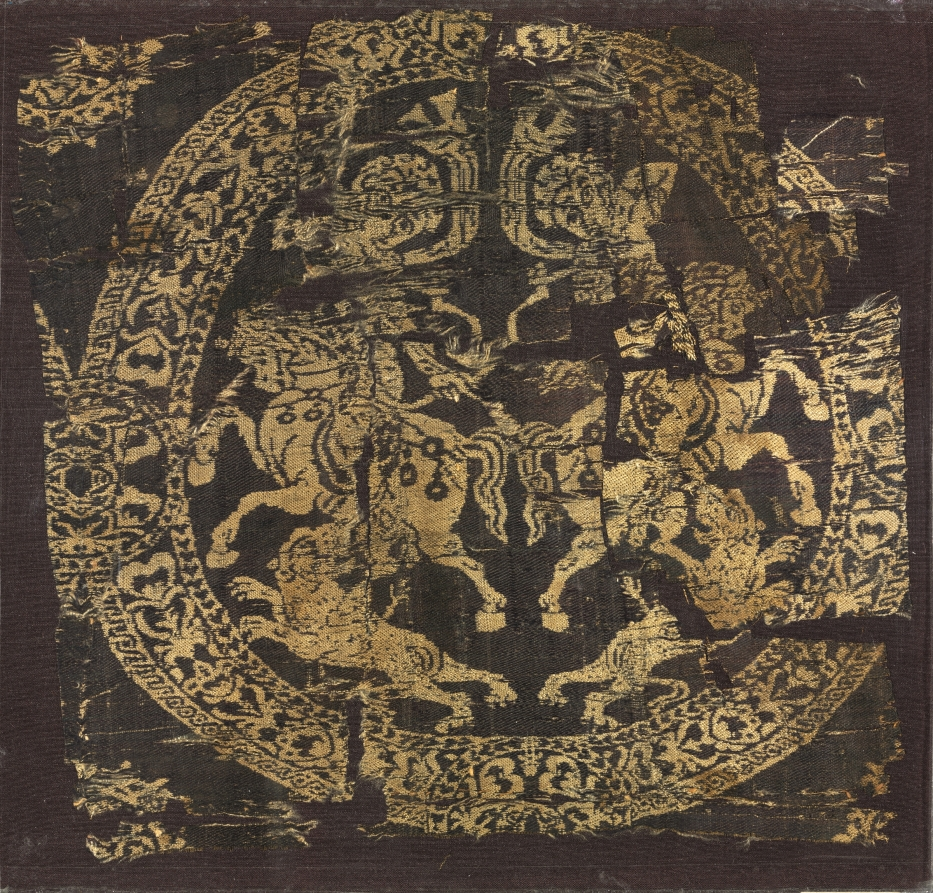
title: Roundel with Amazons, from a tunic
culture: Egypt or Syria(?)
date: 600s–800s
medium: samite: silk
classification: Textile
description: Within a roundel are a pair of mounted Amazons (women warriors) shooting backward at lions, which attack their running horses. The roundel frame is filled with stylized floral motifs and is bordered on the inside by a band of tiny hearts.